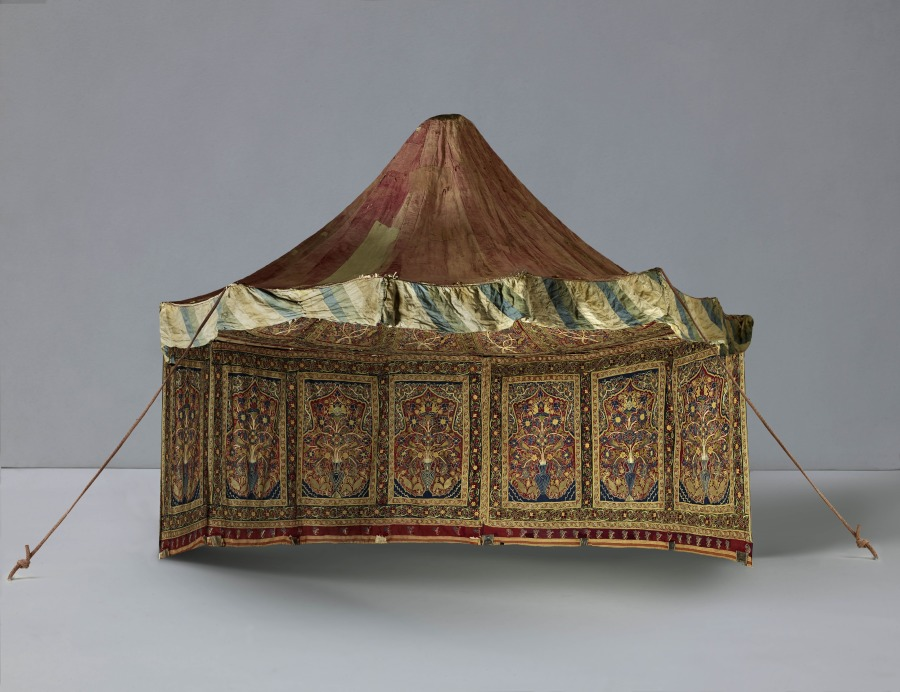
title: Royal Round Tent Made for Muhammad Shah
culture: Iran, Rasht, Qajar period (1779-1925)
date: 1834–48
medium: Interior: wool: plain weave, inlaid work; silk: embroidery, chain stitch; tape, leather; Exterior: cotton, wool: plain weave; rope, iron ring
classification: Textile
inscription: Inscriptions: The central design unit of panel 2014.388.2 and 2014.388.4 has two embroidered inscriptions. 1. Upper inscription (center of the top blossom): "Muhammad shah sultan-e ghazi."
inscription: 2. Lower inscription (on the base of the vase): "Kamtarin bandeh-ye dargah fath'ali."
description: Royal tents were potent symbols of authority, wealth, and power throughout the greater Middle East. Rulers owned thousands of tents. They were used for shelter, shade, and innumerable functions in tent compounds that were essential for imperial ceremonies, travel, and military campaigns. Distinguished by size with elaborately decorated interior walls and ceilings, tents could be as large as castles. Opulent tents were also presented as imperial gifts. Tents are only known through documents before 1600. For example, in Baghdad in 809, Caliph Harun al-Rashid owned 4,000 ceremonial tents and 150,000 camping tents that were stored in the imperial Abbasid treasury. An astonishing variety and quantity of tents were housed in the royal Fatimid tent storeroom in Cairo in 1068–69, including "military tents, fortress tents, and castle tents, manufactured of . . . gold-brocaded stuff embroidered with designs of elephants, wild beasts, horses, peacocks, birds." Since 1600, Ottoman Turkish tents with elaborate floral decoration have been preserved in Istanbul in the Topkapi Palace Museum and Military Museum, and in European collections as war booty, primarily from the Ottoman Turks' attempt to conquer Vienna in 1683. These tents are not done in the Rasht technique, but rather are appliqué. In contrast, royal tents from Iran are extremely rare. This spectacular ceremonial tent is embroidered with the name of its owner, Muhammad Shah, who ruled Iran from 1834 to 1848 during the Qajar dynasty. The radiant jewellike interior features exuberant flora, blossoming vines, and robust birds made with colored wool embellished with silk-thread embroidery.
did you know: Rasht work is named after the city on the Caspian Sea in present-day Iran, which was a major silk trade center with numerous textile workshops.